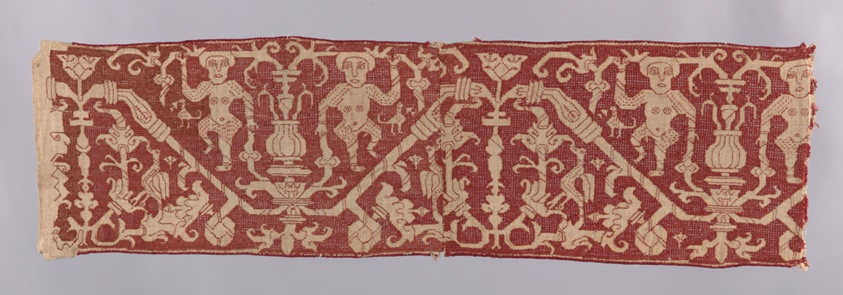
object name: Textile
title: Border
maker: Spain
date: 1575/1625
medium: Linen, plain weave; pulled thread work embroidered with silk back, running and two-sided Italian cross stitches; edged with darning stitches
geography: Spain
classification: textile; needlework (visual works)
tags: flowers, cherubs, urns